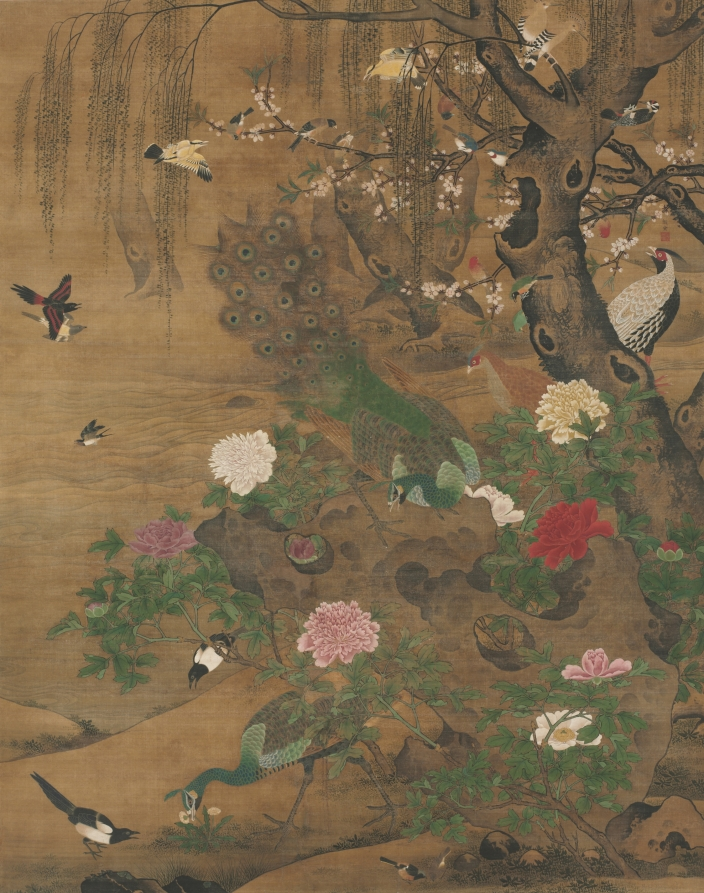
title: Birds Gather under the Spring Willow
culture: China, Ming dynasty (1368–1644)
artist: Yin Hong (Chinese, c. 1430-c. 1500)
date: late 1400s-early 1500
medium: hanging scroll, ink and color on silk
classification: Painting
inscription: 殷宏. [印]金臺世家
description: This scroll depicts a spring scene with all kinds of birds, including one peacock with a hen among peonies. The painting is one of four surviving works by Yin Hong bearing his signature and seals. Some scholars debate whether this work depicts the theme “One Hundred Birds admiring the Phoenix,” a metaphor for human society presenting an idealized hierarchy under imperial rule; other scholars argue that peafowls, as exotic birds not native to China, would not be depicted to represent the emperor. This large painting might have been hung in a palace hall and may have been part of a set depicting the four seasons.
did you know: The peahen is plucking a dandelion.